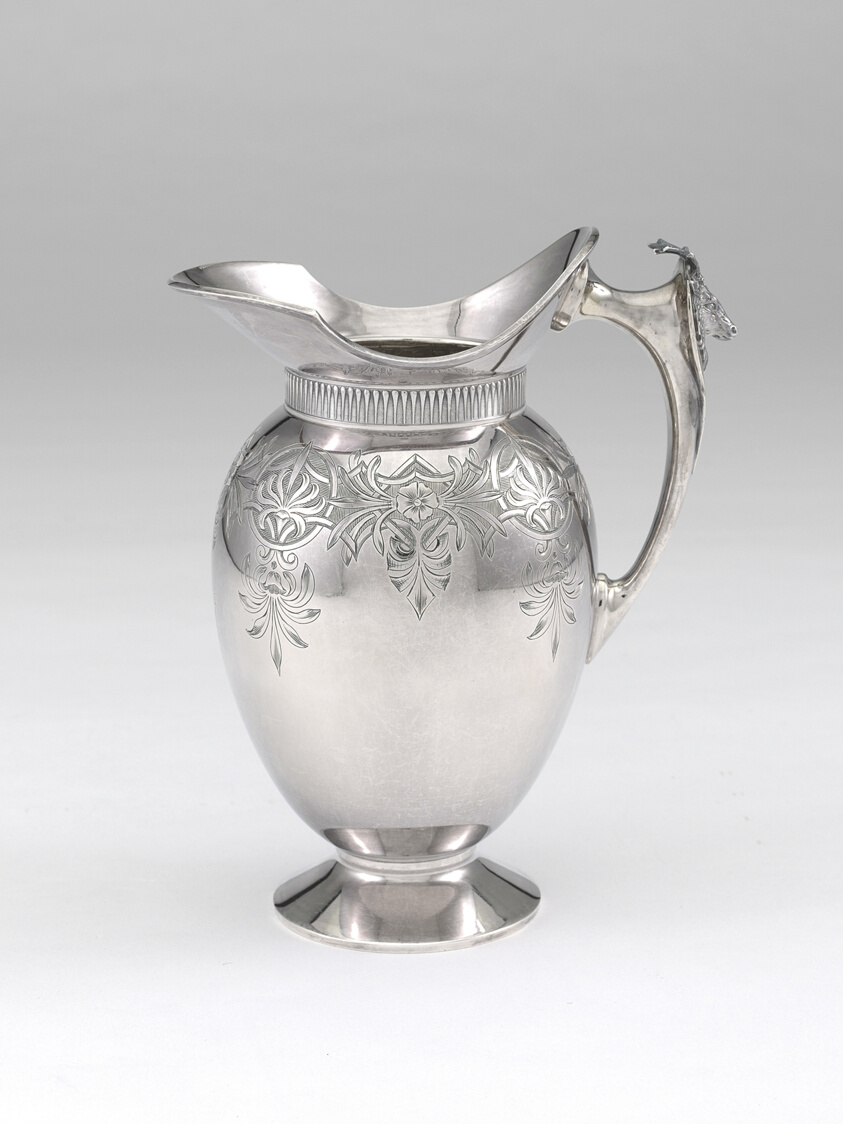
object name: Metalwork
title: Pitcher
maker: Gorham Manufacturing Company (American, founded 1831); Providence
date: 1880–1900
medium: Silver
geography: Providence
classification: pitcher (vessel); silver; vessel; american decorative arts; american arts; decorative arts